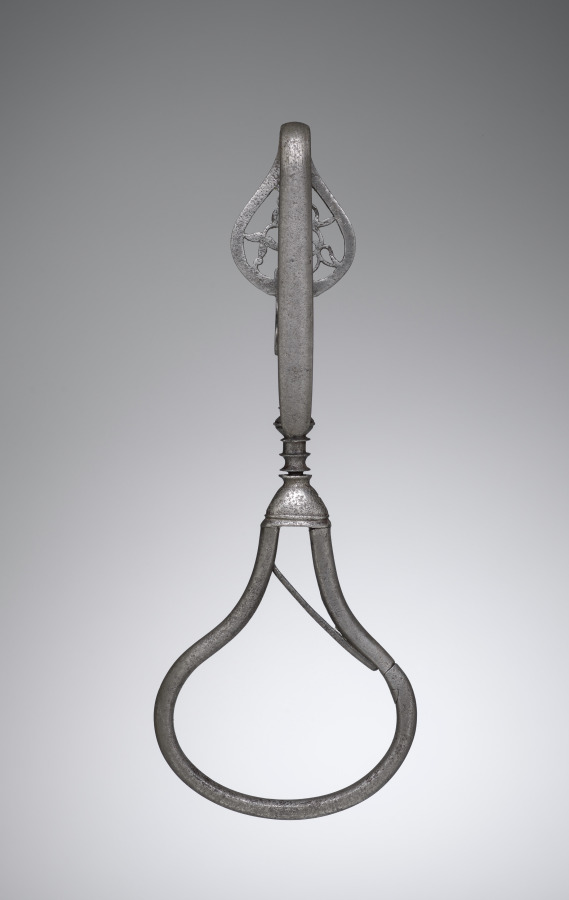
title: Carbine Hanger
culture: Italy, 17th century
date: 1600s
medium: steel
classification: Arms and Armor